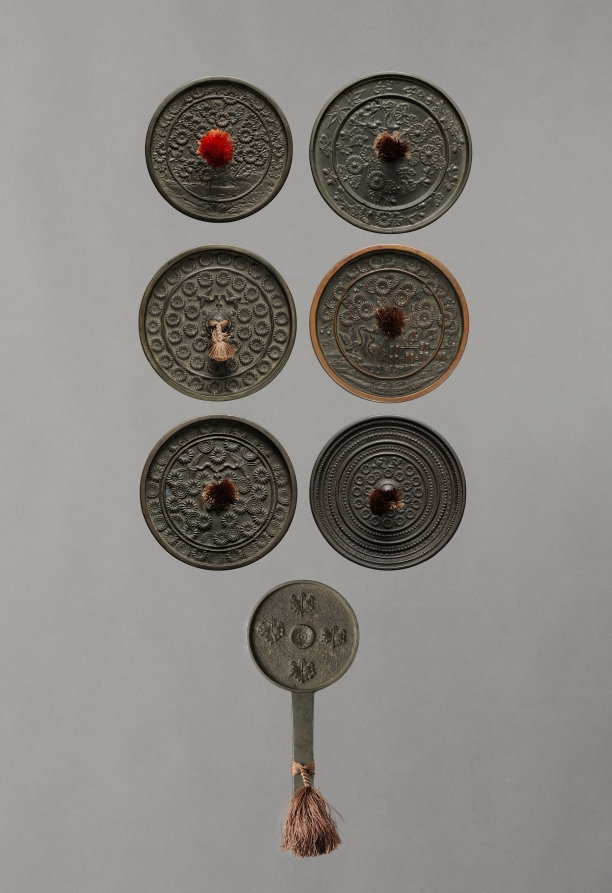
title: Mirror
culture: Japan, Kamakura period (1185–1333)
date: 1200s–1300s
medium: bronze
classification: Metalwork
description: The Japanese used chrysanthemums as decorative elements on mirrors. In the Heian period, a chrysanthemum with cranes or long-tailed birds was a common motif. Later, in the Kamakura and Muromachi periods, chrysanthemum designs were divided into three patterns with different symbolic associations: Chrysanthemum with Cranes represented longevity; Water Flowing suggested longevity as well as the Noh drama Kikujido, or Chrysanthemum Boy; and East Fence alluded to the poem "Drinking Wine" by Tao Yuanming (365–427 CE). Here, the mirror featuring Buddhist iconography (kyojo) and a chrysanthemum design on the back shows that the flower was also appreciated in the context of Buddhism in the Kamakura period.